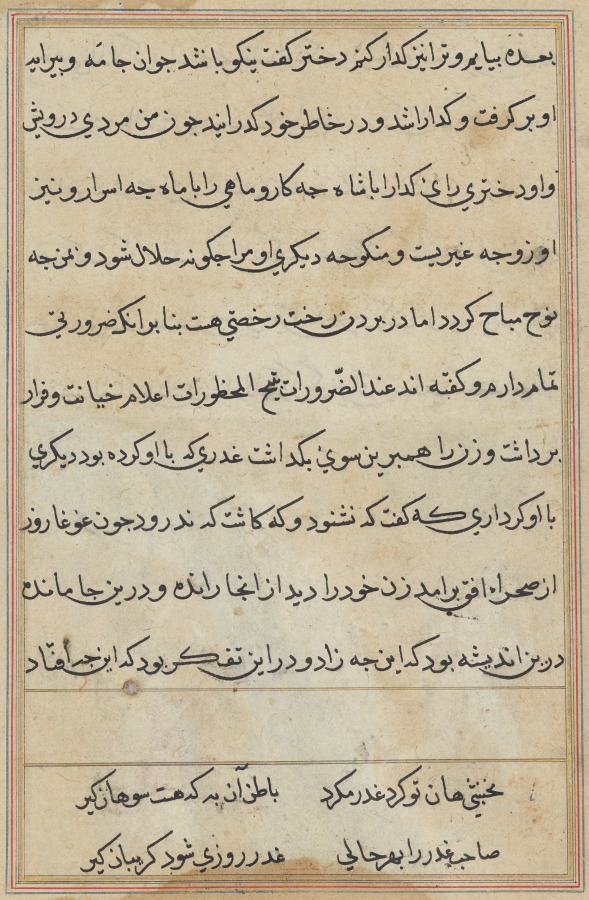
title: Page from Tales of a Parrot (Tuti-nama): text page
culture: Mughal India, court of Akbar (reigned 1556–1605)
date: c. 1560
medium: gum tempera, ink, and gold on paper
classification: Painting